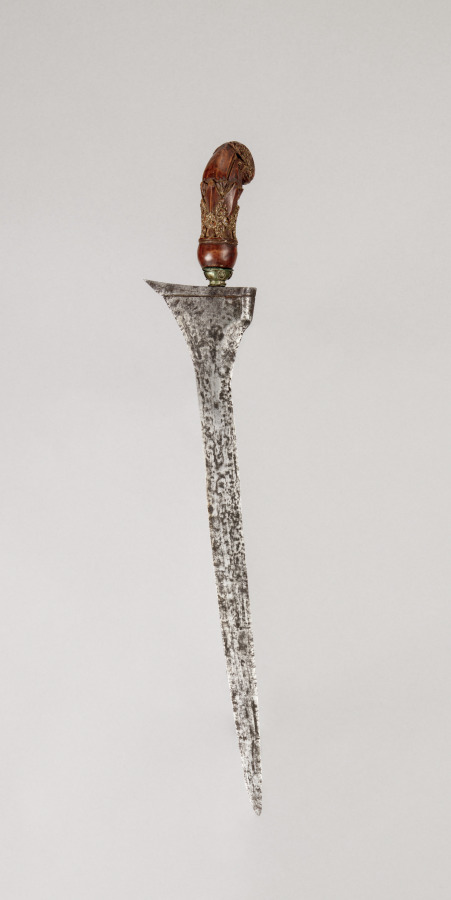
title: Sword (Kris)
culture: Java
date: 1800s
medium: iron with carved wooden handle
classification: Arms and Armor